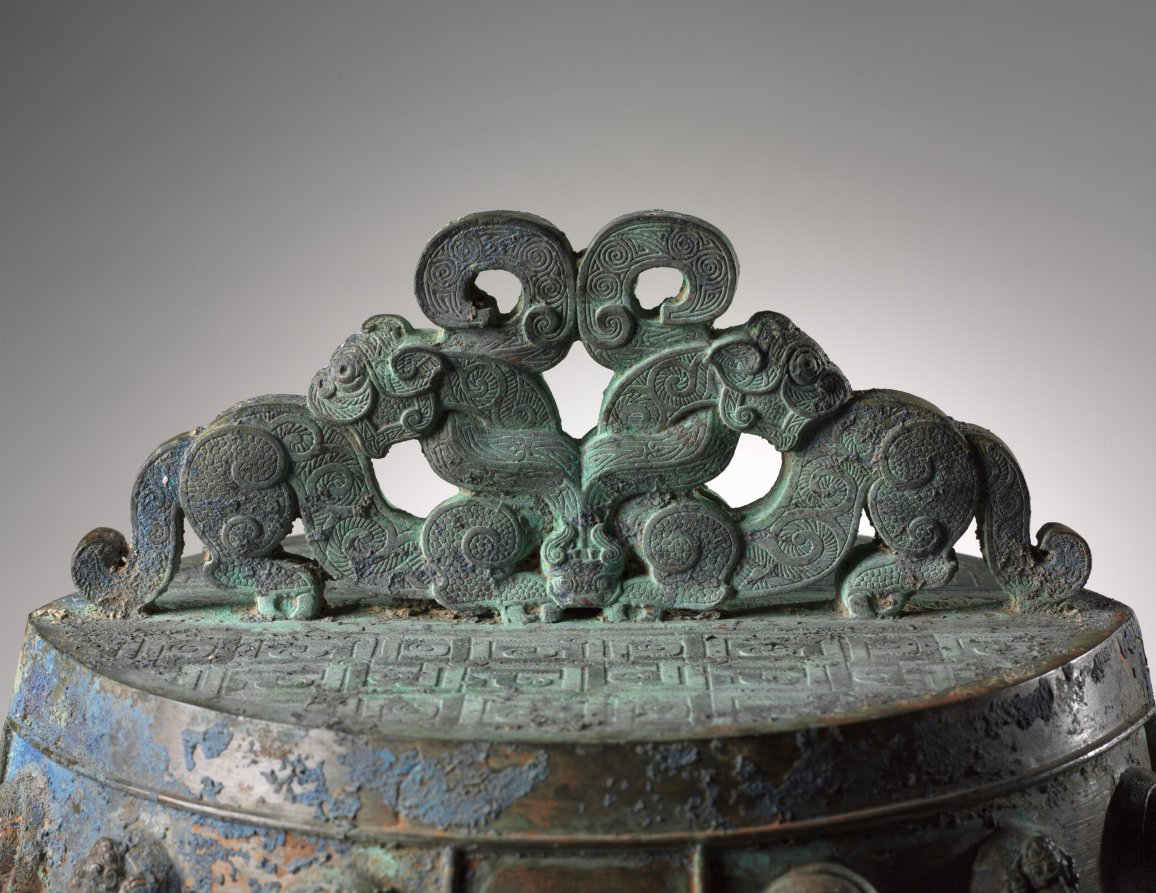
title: Bell (Bo Zhong)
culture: China, Eastern Zhou dynasty (770–256 BCE)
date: early 400s BCE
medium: bronze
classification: Metalwork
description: Music in the Eastern Zhou dynasty not only served ritual purposes but also provided entertainment in feudal courts. The elliptical cross-section of the Chinese bronze bell is unique; it could produce two notes depending on where the bell is struck, either at the rim or near the center. The bell is suspended when played and often belongs to a graduated set arranged according to pitch and size. This bell displays elaborate ornamentation and exquisite workmanship. A twin-bodied serpent intertwined with two tigers forms the suspension loop at the top. Coiled serpents form the knobs on the body. The lower part bears an animal mask, its horns interlaced with abstract bird designs.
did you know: The bell could produce two notes depending on where it is struck.